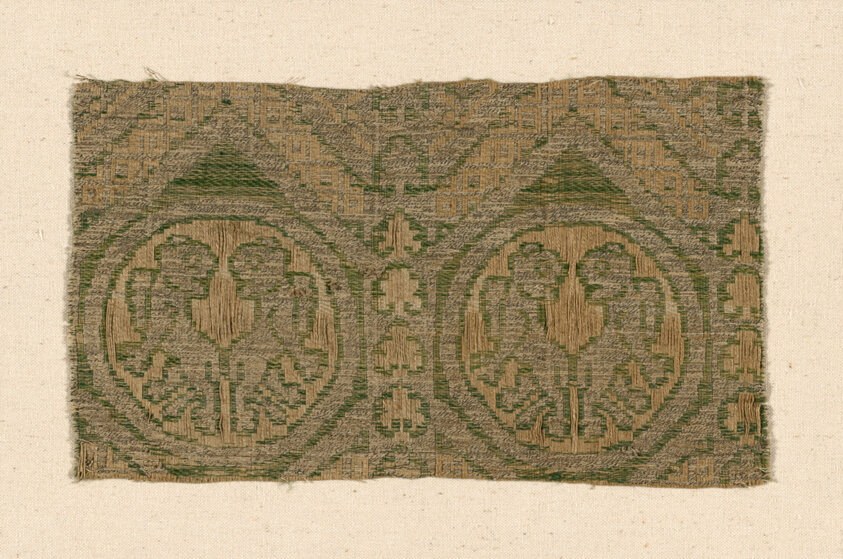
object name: Textile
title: Fragment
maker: Spain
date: 13th/14th century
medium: Silk, linen, and gilt-animal-substrate-wrapped linen, weft-faced three-color complementary weft twill weave with inner warps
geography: Spain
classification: textile; weaving